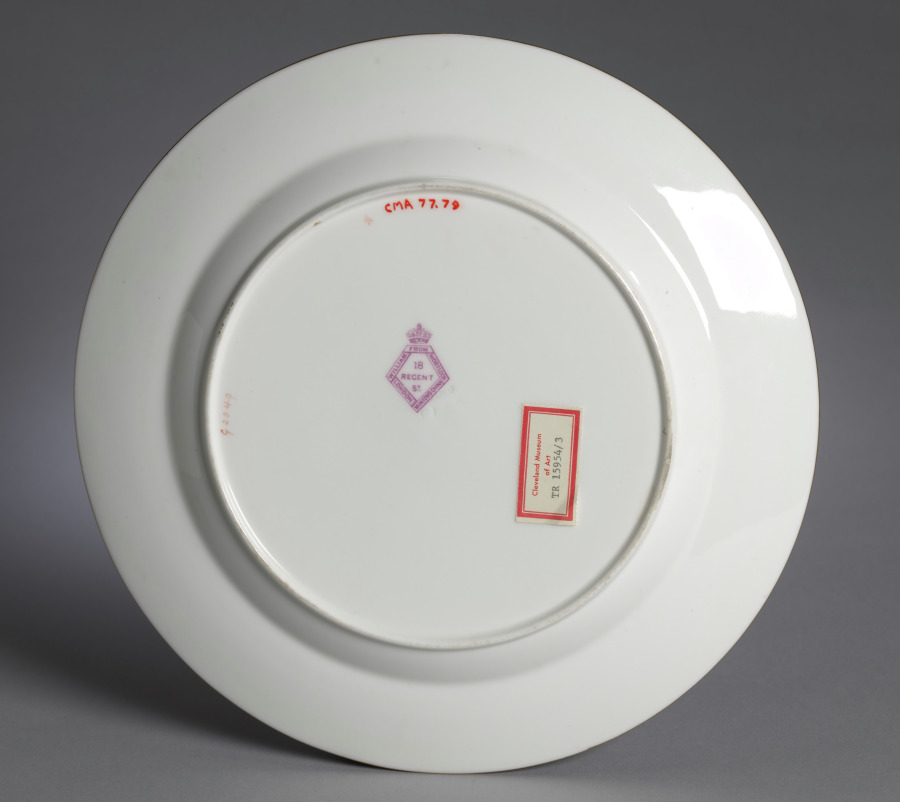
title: Plate made for Emperor Meiji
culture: England, 19th century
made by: Minton Pottery and Porcelain Factory (British)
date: c. 1875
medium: porcelain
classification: Ceramic